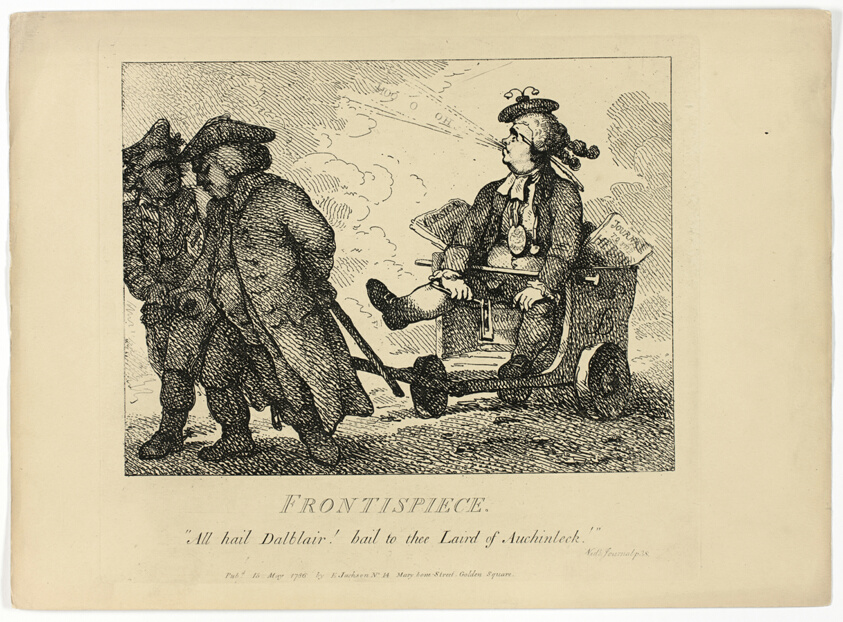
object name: Print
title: Boswell's Tour of the Hebrides: Frontispiece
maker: Thomas Rowlandson (English, 1756-1827)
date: 1786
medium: Etching on paper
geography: England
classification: etching; print; prints and drawing